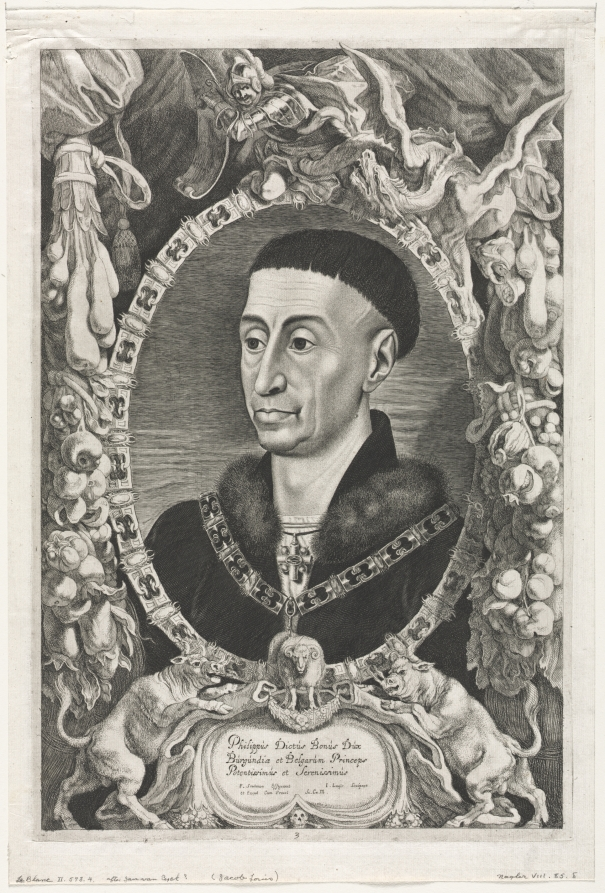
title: Philip the Good of Burgundy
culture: Netherlands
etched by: Pieter Claesz. Soutman (Dutch, 1657)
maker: after Rogier van der Weyden (Flemish, c. 1399–1464)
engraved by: Jacob Louys (Dutch, 1595–after 1673)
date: 1643–44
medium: etching and engraving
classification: Print